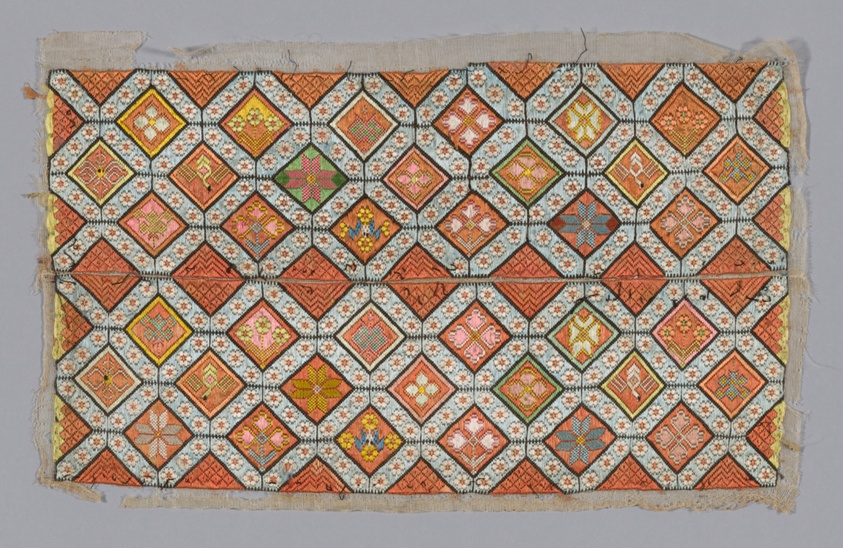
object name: Textile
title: Panel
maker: Han-Chinese (China)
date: Qing dynasty (1644–1911), 1875/1900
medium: embroidered gauze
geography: China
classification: embroidery; textile